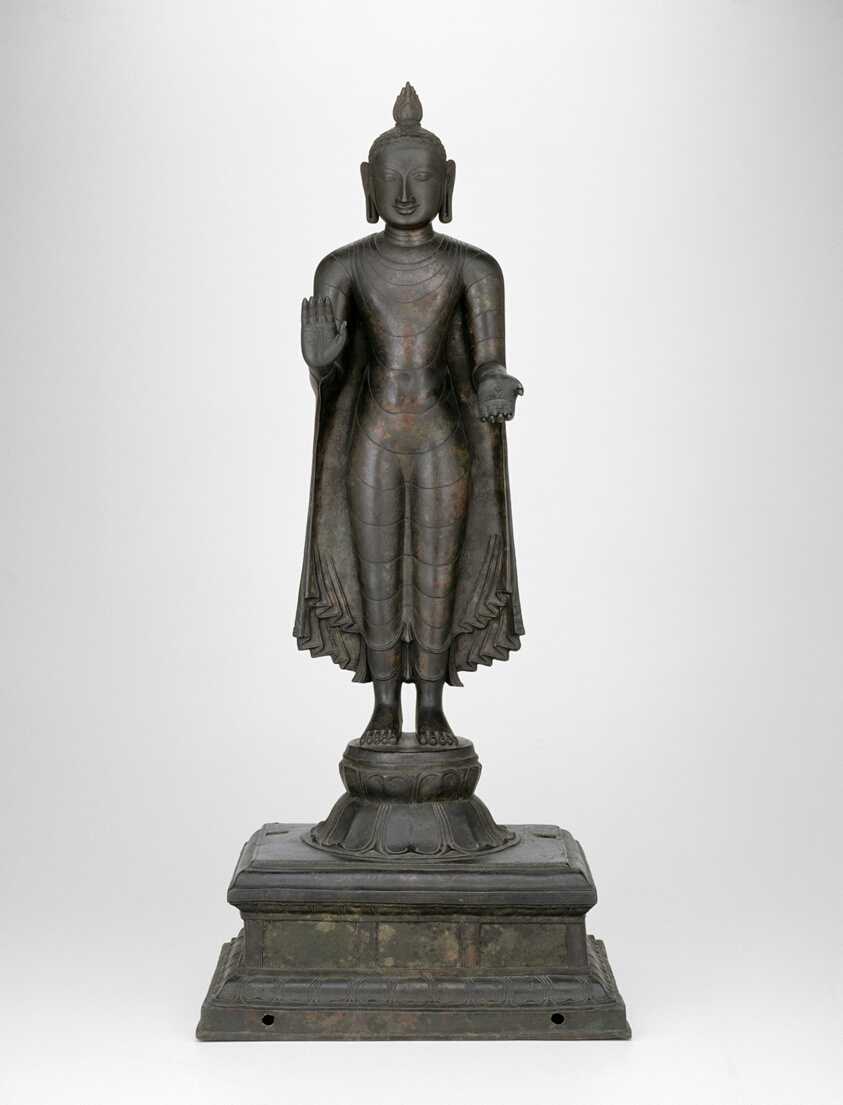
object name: Sculpture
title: Standing Buddha with Left Hand in Gift Giving Gesture (varadamudra)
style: South Asian, chola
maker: India; Tamil Nadu, Nagapattinam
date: Chola period (c. 855-1279), about 11th century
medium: Bronze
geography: Nagapattinam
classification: bronze; metal; sculpture; asian art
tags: Buddha